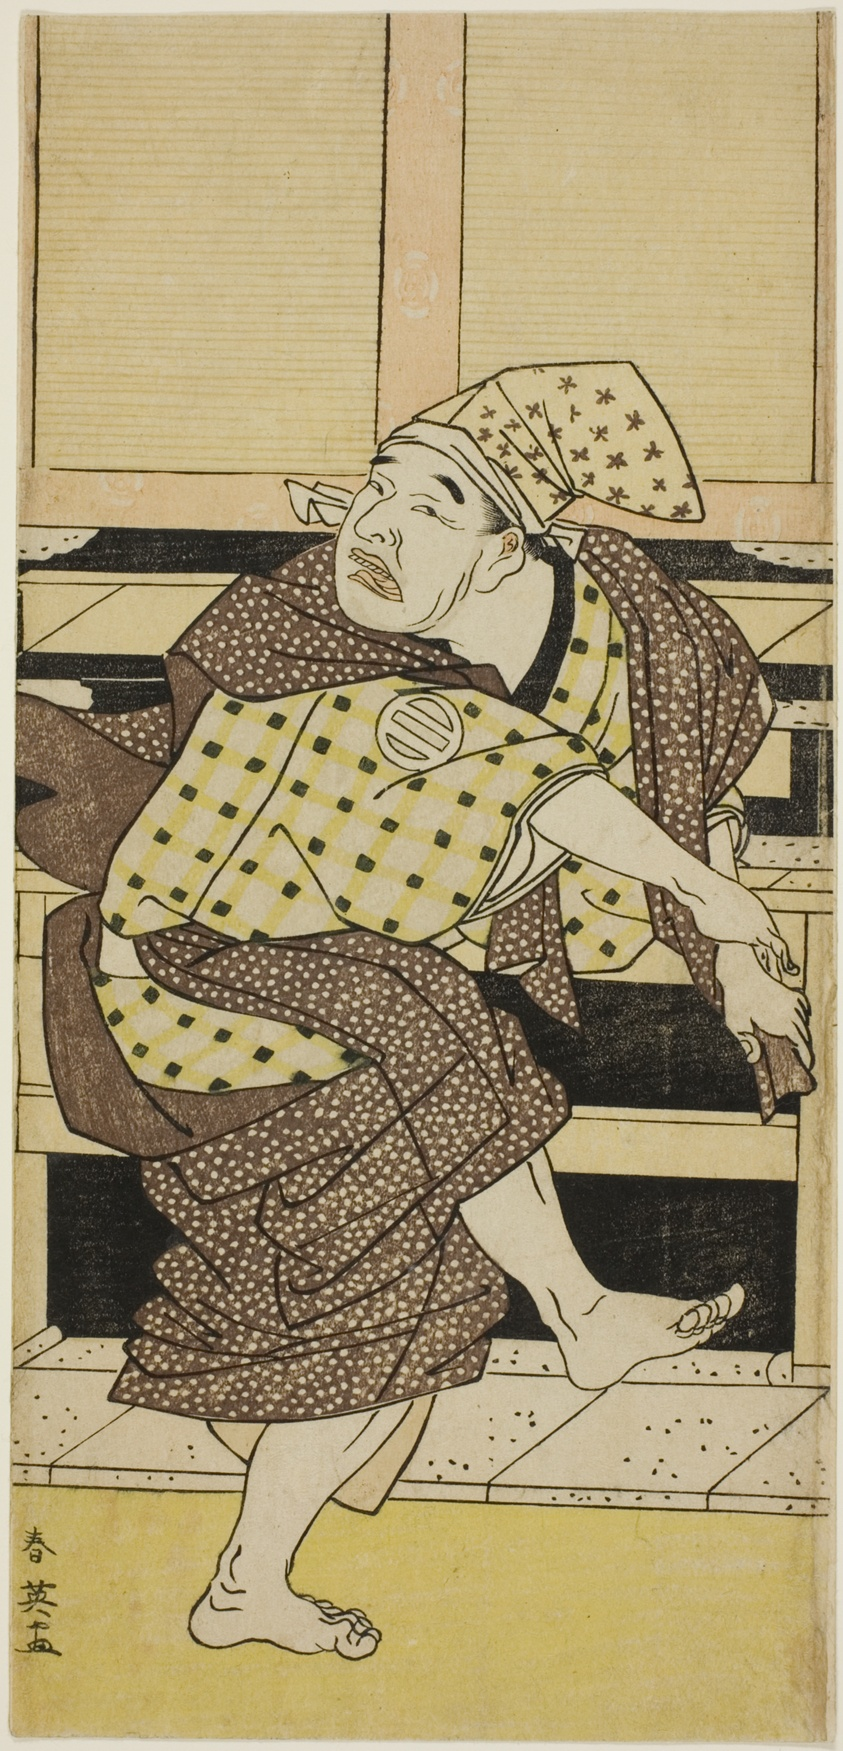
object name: Print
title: Actor Asao Tamejûrô I as Drunken Gotôbei Doing a Sambasô Dance in “Yoshitsune’s Koshigoe Petition” (“Yoshitsune Koshigoe jô”)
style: Japanese (culture or style)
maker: Katsukawa Shun’ei; Japanese, 1762–1819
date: About 1790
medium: Color woodblock print; hosoban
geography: Japan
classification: woodblock print; print; asian art